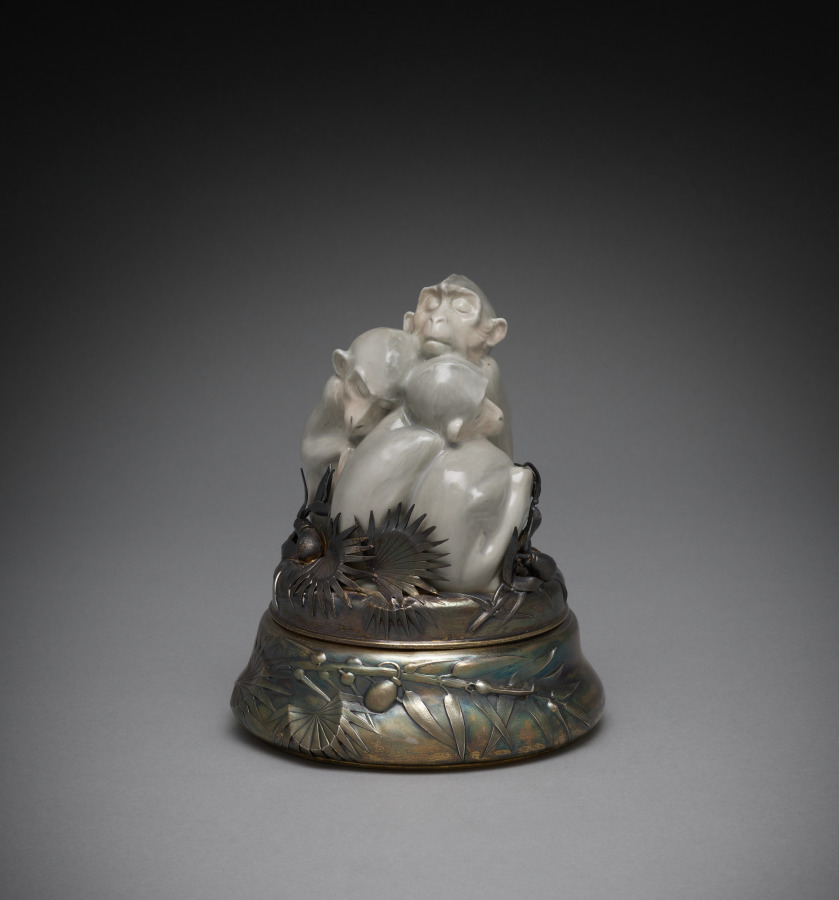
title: Monkey Figure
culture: Denmark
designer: Ingeborg Plockross-Iminger (Danish, 1872–1962)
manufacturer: Bing & Grøndahl (Danish, est. 1853)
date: c. 1900–1925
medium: porcelain, silver-gilt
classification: Sculpture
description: This figure featuring three monkeys was designed by the Danish ceramist Ingeborg Plockross-Iminger. The figure is displayed with a French silver mount that references Japonisme and Art Nouveau styles that were popular at the end of the 1800s and experienced a resurgence in the 1920s because of increased importation of Japanese goods to the West.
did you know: This ceramic figure usually stands alone, without a silver mounting.